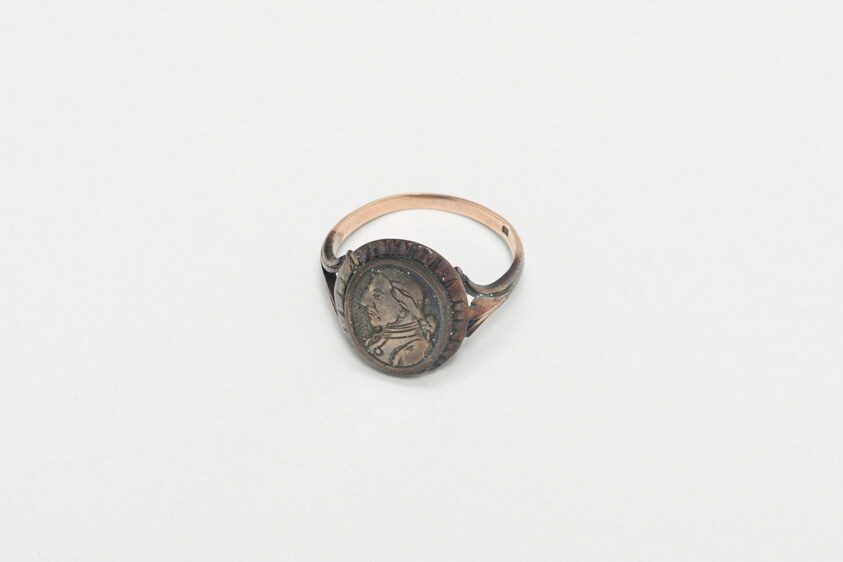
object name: Decorative Arts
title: Ring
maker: Artist unknown (American, 19th century)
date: 1800–1900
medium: Gold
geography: United States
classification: ring (jewelry); jewelry; american decorative arts; american arts; decorative arts